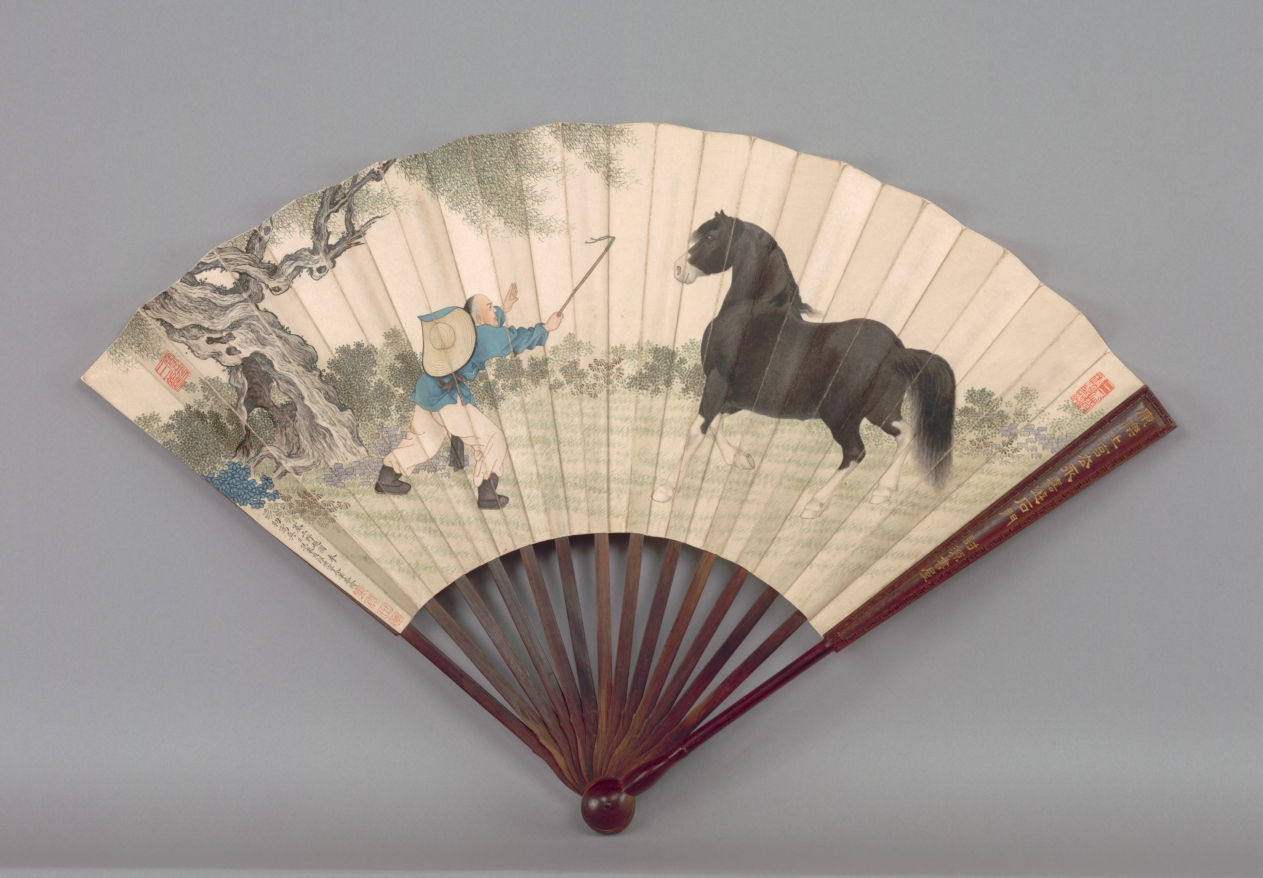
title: A Vignette of Life on the Frontier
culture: China, Qing dynasty (1644-1911), Kangxi period (1662-1722)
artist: Jiao Bingzhen (Chinese, active c. 1670–1726)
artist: and Giuseppe Castiglione (Italian, 1688–1766)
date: c. 1717–22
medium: Folding fan; ink and color on paper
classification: Painting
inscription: 塞上野趣圖。奉勅寫真。臣焦秉貞郞世寧合筆恭繪。[印]秉貞; 世寧.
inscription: 2 seals of the Qianlong emperor (r. 1736-95). 12 poems by the Qianlong emperor and inscribed in clerical script by Wang Youdun 汪由敦 (1692-1758).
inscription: 1 poem incised on the outer ribs of the fan, front and back by Dong Bangda 董邦達 (1699–1769).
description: Jiao Bingzhen, a court painter largely active during the reign of the Kangxi Emperor, was the senior artist on this fan. Jiao painted the Manchu horse trainer and the setting into which the horse was inserted by Giuseppe Castiglione. Each artist was bonded to his own artistic tradition, while flexibly and harmoniously accommodating the others’ style. Jiao’s brushwork displays rigor and control, particularly in the twisting and turning trunk of the willow. The treatment of the figure and his clothes is an exercise in linearity. The horse trainer’s gesture and posture closely adhere to the known repertoire of the Chinese figural tradition, but the specificity supplies a sense of documentary reportage of life on the frontier. His shaved forehead and white temples identify him as a Manchu. The thick fabric of his garments was defined in a different sort of brush line than Jiao typically used for Chinese scholars or travelers. Jesuit priest Castiglione, a newcomer to China at the time this was painted, brought a sense of Western realism to the horse. Poised at a slight angle, the horse is alert, its eye gleaming. Its contours suggest the bulk of its anatomy with skilled but not overpowering modelling, and careful and subtly wrought attention to detail, such as fluttering strand of mane. Because of his ability to combine traditional Chinese painting techniques with Western methods of perspective and chiaroscuro, Castiglione went on to be the most favored and honored of the missionary artists who served the early Qing emperors. Throughout his career, in addition to imperial demands for portraits and records of court events, Castiglione continued to paint favored imperial horses. These animal subjects reflect the desire of Kangxi and his successors to celebrate their nomadic origins and to keep alive the martial prowess of the Manchu warriors in their new and sedentary world of conquered China.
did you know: One horseshoe is visible beneath the uplifted hoof.